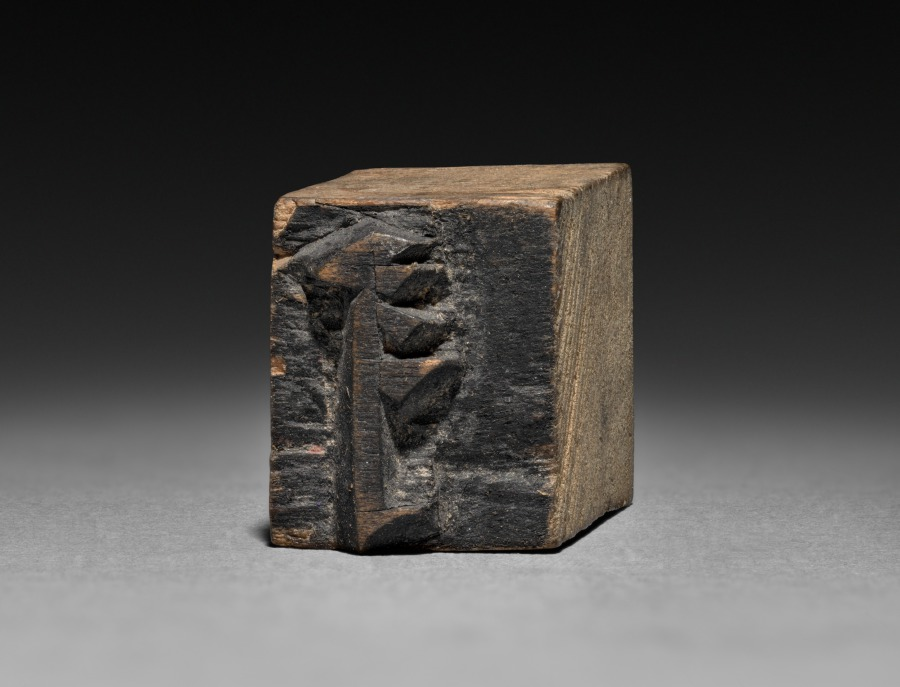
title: Wooden Moveable Type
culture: China, Nigur, 19th century ?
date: probably 1800s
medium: wood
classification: Wood